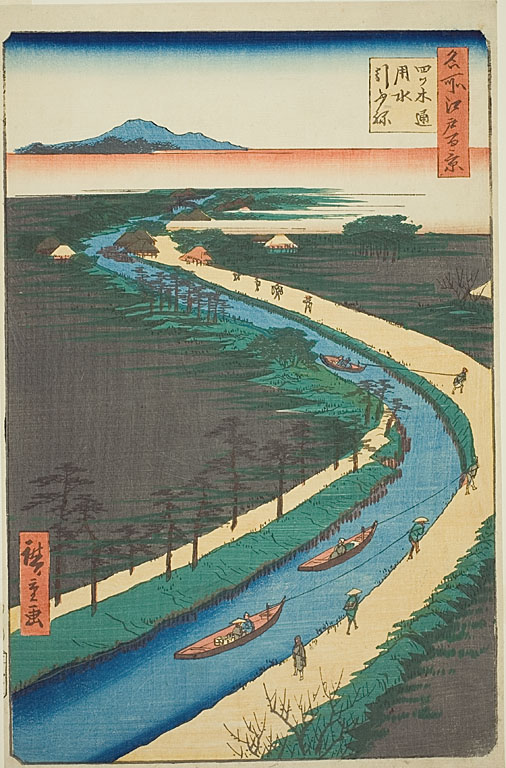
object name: Print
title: Towboats along the Yotsugidori Canal (Yotsugidori yosui hikifune), No.33 from the series "One Hundred Famous Views of Edo (Meisho Edo hyakkei)"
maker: Utagawa Hiroshige (Japanese, 1797-1858)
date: 1857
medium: Color woodblock print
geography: Japan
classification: woodblock print; print; asian art